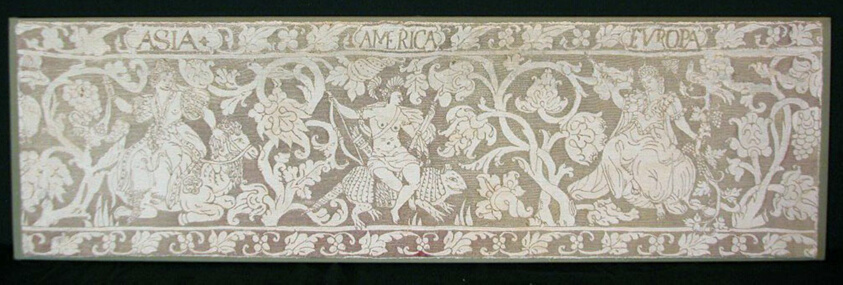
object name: Textile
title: Panel with the Figures of Three Continents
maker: Italy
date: 17th century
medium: Linen; plain weave; embroidered with silk in bullion, chain, crested chain, rosette chain, closed feather, long-armed cross, whipped long-armed cross, knot and stem stitches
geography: Italy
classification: textile; needlework (visual works)